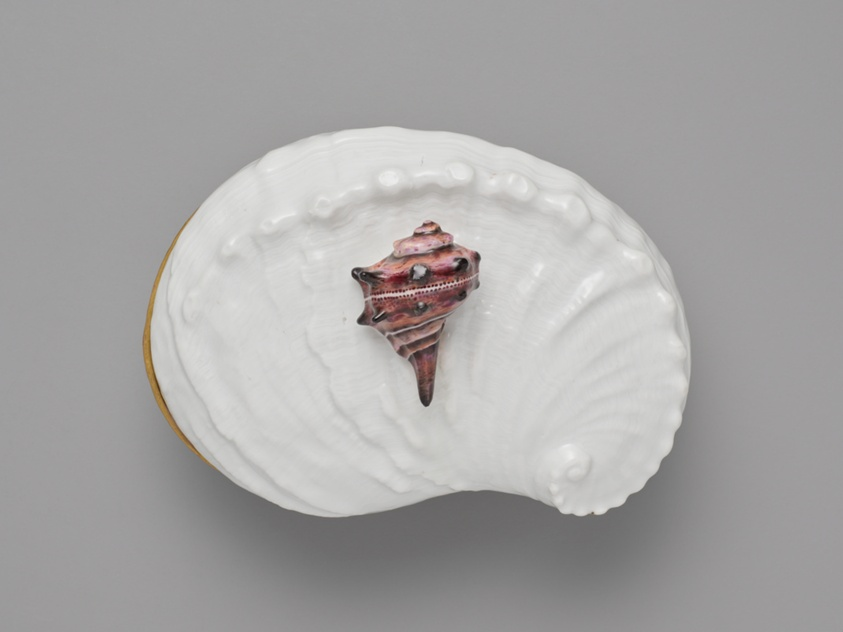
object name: Ceramics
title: Sweetmeat Box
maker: Meissen Porcelain Factory (German, founded 1710); Modeled by J. F. Eberlein (German, 1696-1749)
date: 1746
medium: Hard-paste porcelain, polychrome enamels, and gilt metal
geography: Meissen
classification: porcelain; box; ceramics; enamel; european decorative arts; metal; vessel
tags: shells, seas